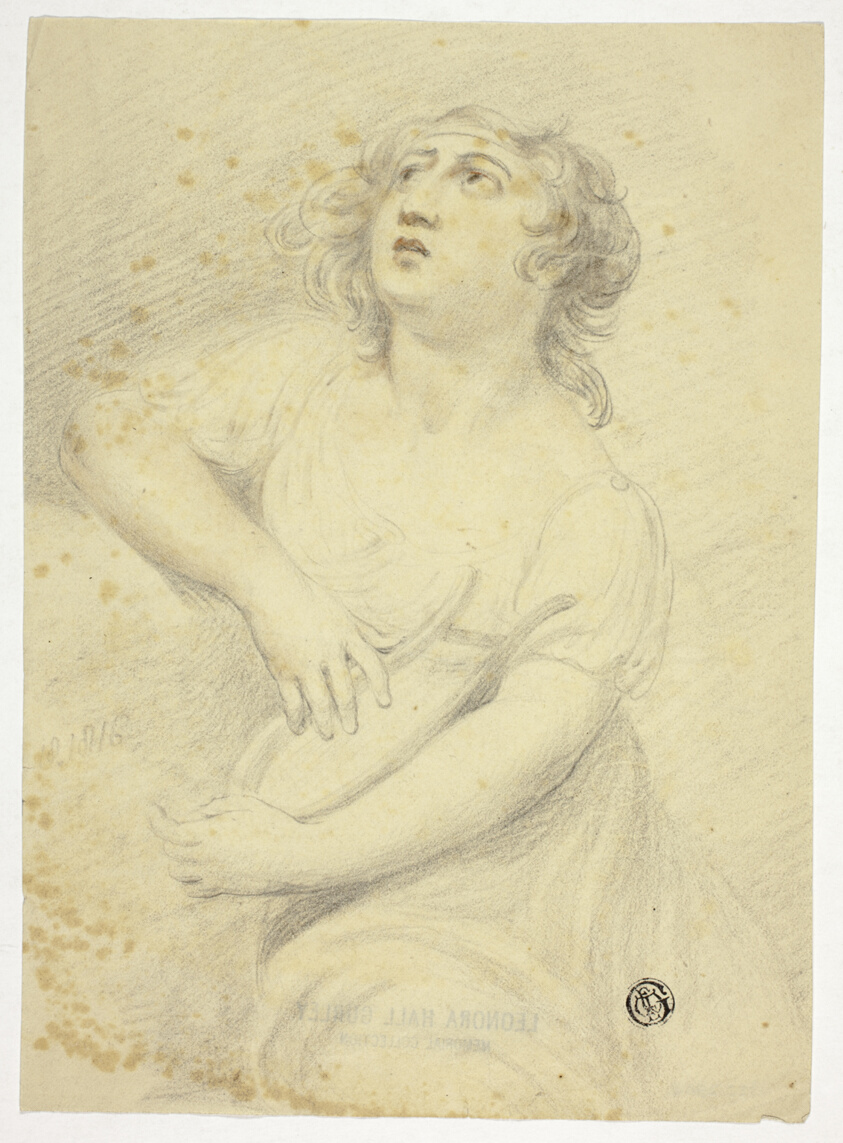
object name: Drawing and Watercolor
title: Woman with Lyre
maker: Possibly Samuel De Wilde; English, 1748-1832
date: c. 1816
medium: Charcoal, with touches of red chalk and brown chalk, on cream wove paper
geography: England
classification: ink or chalk wash; drawings (visual works); prints and drawing